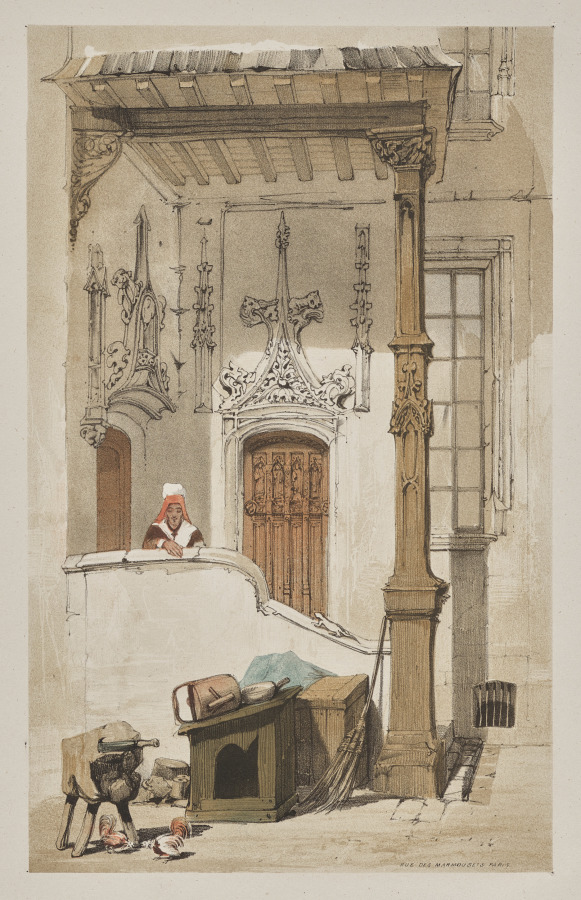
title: Picturesque Architecture in Paris, Ghent, Antwerp, Rouen: Rue des Marmousets, Paris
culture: England, 19th century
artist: Thomas Shotter Boys (British, 1803–1874)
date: 1839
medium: lithograph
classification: Portfolio